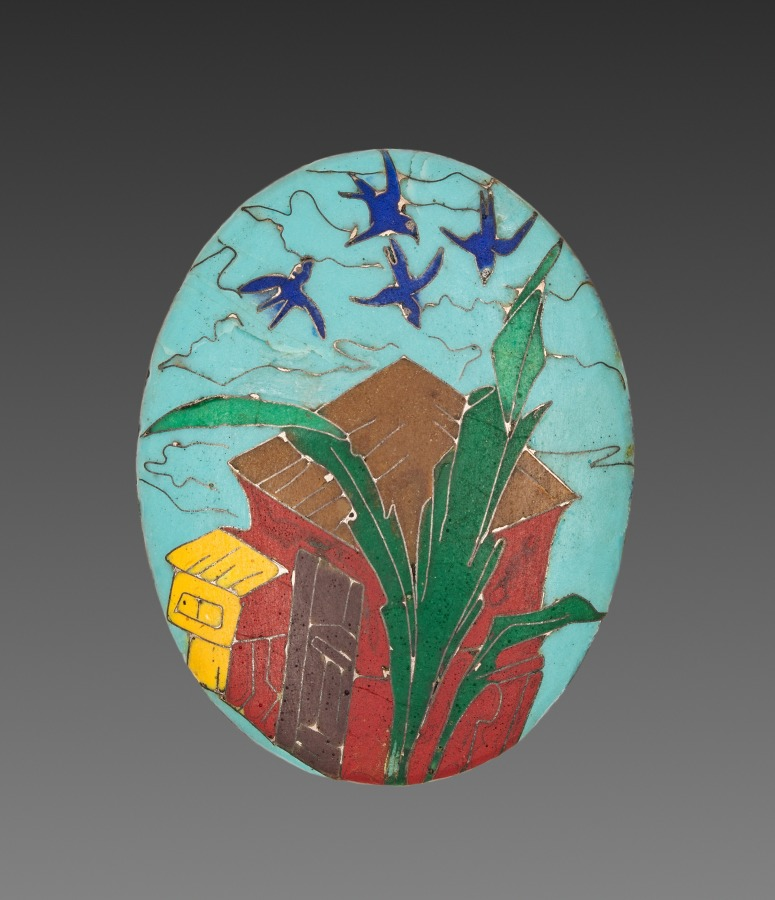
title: Locket Panel (1 of 4)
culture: France, 19th century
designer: Alexis Falize (French, 1811–1898)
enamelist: Antoine Tard (French, active 1860–1889)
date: 1800s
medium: gold and cloisonné enamel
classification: Jewelry